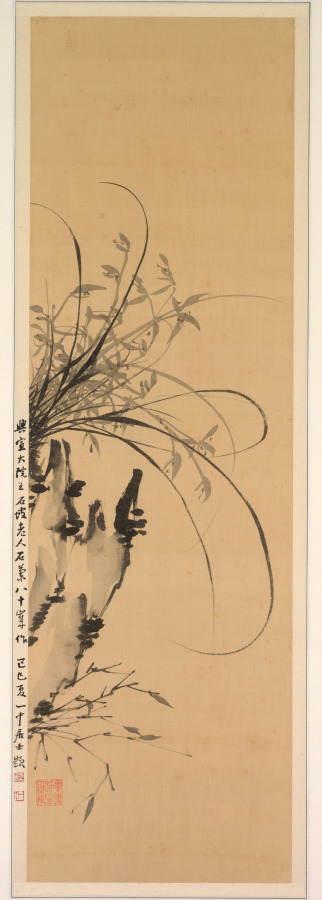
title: Orchids and Rocks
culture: Korea, Joseon dynasty (1392–1910)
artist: Yi Ha-eung (Korean, 1820–1898)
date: 1897–98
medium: Eight-panel folding screen; ink on silk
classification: Painting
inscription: Translation: [I] painted for the high minister Yangwon. [I] humbly request your corrections and advice [on my painting]. [By] an eighty-year old gentleman of rocks.)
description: Yi Ha-eung (1820−1898), the artist of this eight-panel folding screen, was one of the most influential men in late 19th-century Korea. Acting as the regent for his son, King Gojong (1852−1919), who ascended the throne at the age of thirteen, Yi ruled Korea from 1866 to 1873. In addition to his illustrious political career, Yi was also recognized as one of the most celebrated artists who led the revival of literati art in late 19th-century Korean art. In particular, he was recognized as the master of orchids, one of the “Four Gentlemen” (plum, orchid, chrysanthemum, and bamboo) themes. Solely relying on monochrome ink, Yi depicted the curvilinear silhouettes of cymbidium orchid leaves dramatically hanging down from cliffs. Growing in wilderness and redolent with fragrance, orchids were often associated with the perseverance of principled gentlemen, and thus became one of the most popular subjects of scholar-artists' paintings.On the upper right corner of the far left panel, Yi wrote a short inscription stating that he painted the work at the age of 80.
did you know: The artist of this elegant painting is the formidable politician Yi Ha-eung (1820–1898), who is known for a seclusion policy that aimed to protect Korea and its sovereignty from foreign influences.